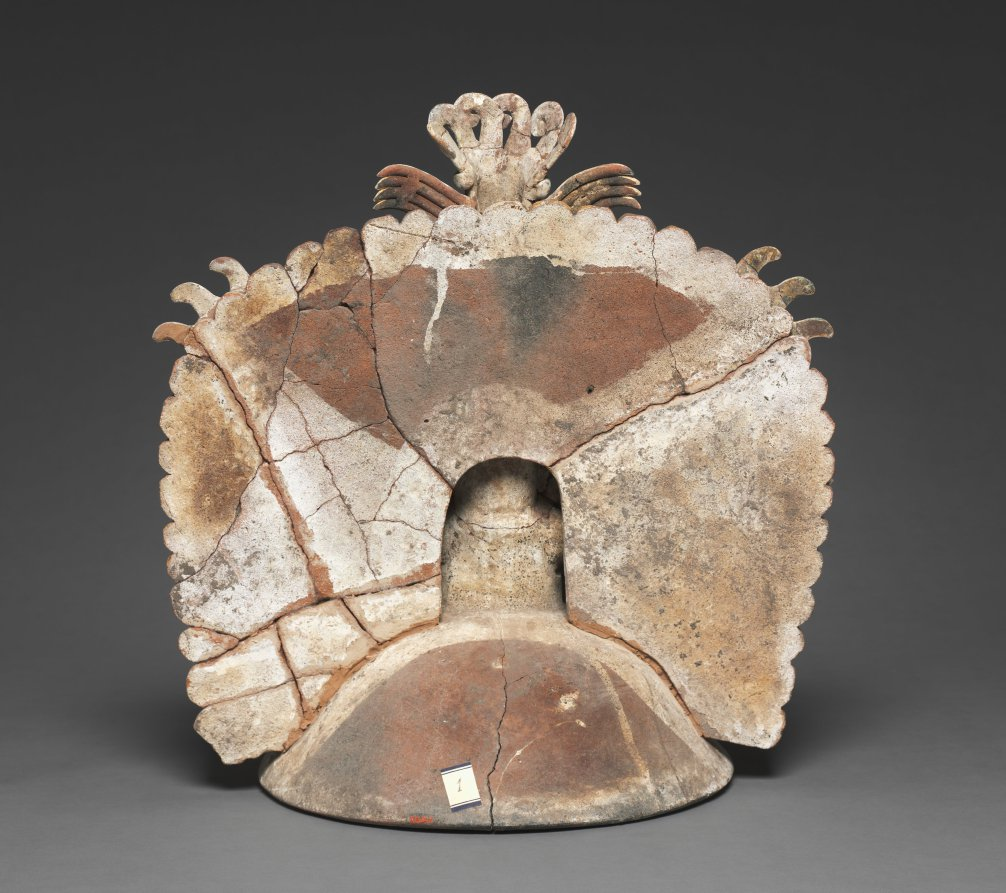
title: Incense-burner Cover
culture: Guatemala, Escuintla Region, early 6th Century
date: c. 500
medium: earthenware with slip and pigments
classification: Ceramic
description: This elaborate clay construction served as the cover and chimney of a basin used to burn copal incense. Although probably manufactured in what is now Guatemala, the form and fabrication are based on examples from Teotihuacan in central Mexico, hundreds of miles away. Intensive trade between the two regions, or even a Teotihuacan colony in Guatemala seems likely. The masked, dressed, and ornamented moundlike form probably represents a mortuary bundle or a cult image.